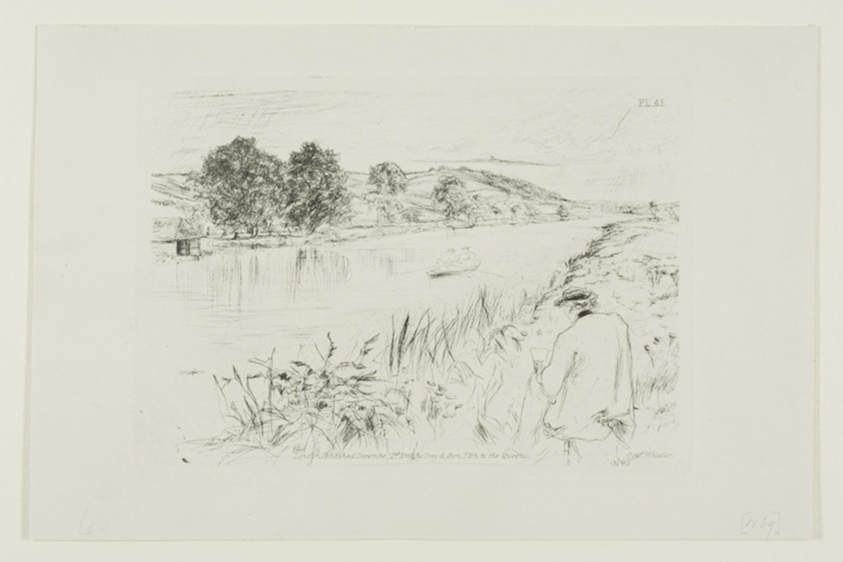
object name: Print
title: Sketching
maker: James McNeill Whistler (American, 1834-1903)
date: 1861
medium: Etching and drypoint with foul biting in black ink on ivory wove paper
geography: United States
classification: etching; foul biting; print; prints and drawing; paper; drypoint